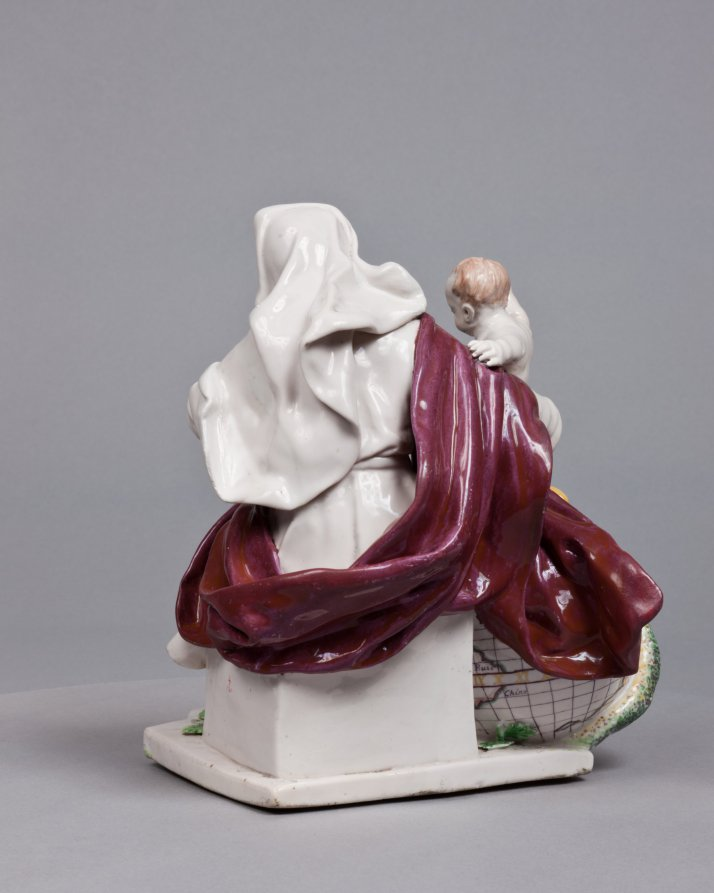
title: Madonna and Child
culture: England, Chelsea, 18th century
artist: Chelsea Porcelain Factory (Britain, London, 1745–84)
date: c. 1755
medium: porcelain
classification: Ceramic